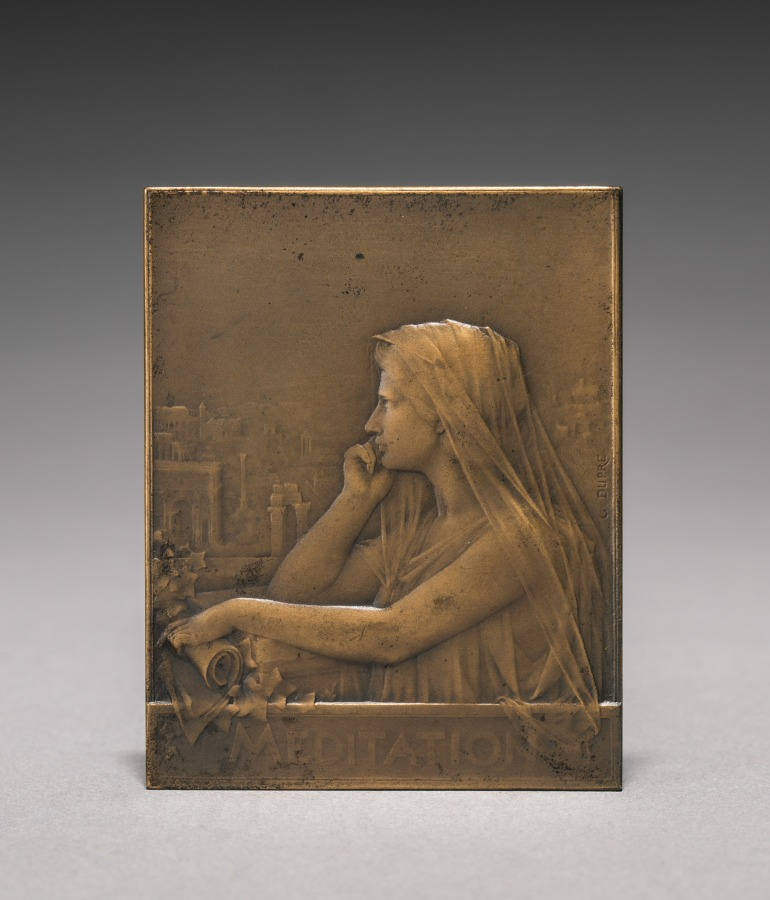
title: Medallion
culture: France, 19th-20th century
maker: Georges Dupré (French, 1869–1909)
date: c.1899–1903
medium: bronze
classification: Metalwork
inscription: "Meditation"; signed: "G. Dupré."